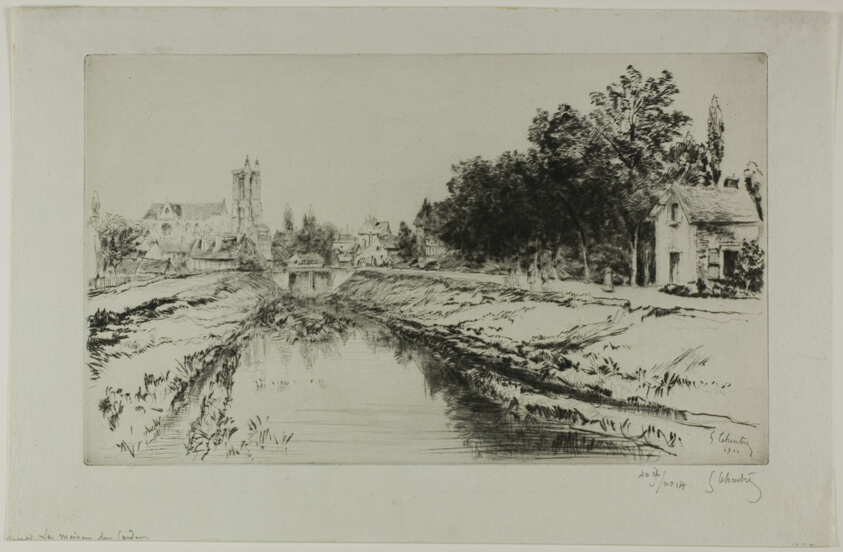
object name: Print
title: The Guard House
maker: Gustave Leheutre (French, 1861-1932)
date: 1901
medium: Etching, drypoint and plate tone on ivory laid paper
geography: France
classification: etching; print; prints and drawing